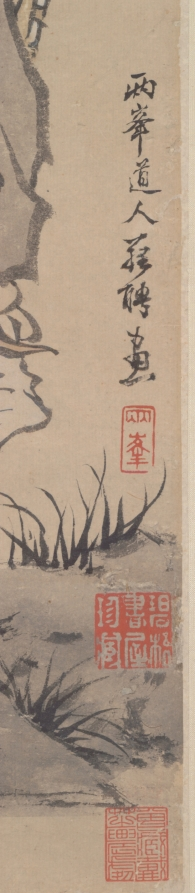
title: Zhong Kui Supported by Ghosts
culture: China, Qing dynasty (1644–1911)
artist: Luo Ping (Chinese, 1733–1799)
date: 1700s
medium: hanging scroll; ink and light color on paper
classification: Painting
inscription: 兩峰道人羅聘畫 【印】 兩峰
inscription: 4 additional seals: 3 of Dai Zhi 戴植 (19th c.); 1 of Ren Bonian 任伯年 [Ren Yi 任頤] (1840–1895)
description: In popular belief, Zhong Kui is a powerful guard against evil spirits, particularly on New Year’s Day and at the Double-Fifth Festival, on the fifth day of the fifth lunar month, when his image is displayed in households to prevent diseases and other misfortunes.